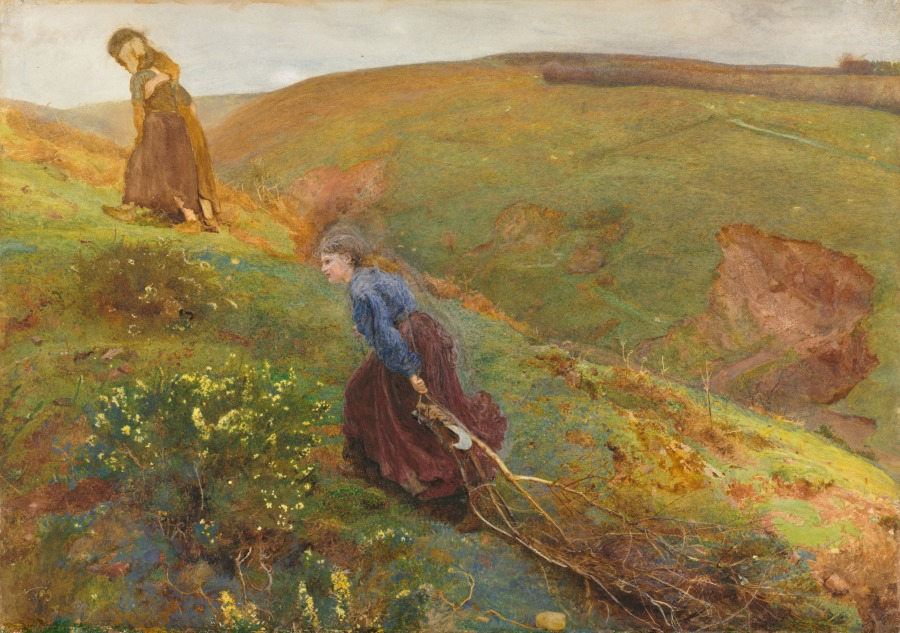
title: The Wood Gatherers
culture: England, 19th century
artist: John William North (British, 1842–1924)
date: 1869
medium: watercolor and gouache with scratch-away and touches of shell gold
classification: Drawing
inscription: inscribed, lower left, in white gouache: N and in ochre: 69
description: John William North’s watercolors of the rural landscape of Somerset unite the seemingly contradictory states of minutely rendered detail with atmospheric effects. Herbert Alexander, the artist’s biographer, described the artist’s interpretation of nature as similar to that of a poet, suggesting rather than describing: "In watercolor and oil an effect of intricate detail is found on examination to be quite illusive—multitudinous form is conjured by finding and losing it in endless hide-and-seek till the eye accepts infinity."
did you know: In addition to his artistic career, John William North championed social justice for the agricultural laboring class in England, campaigning for decent rural sanitation and social housing.